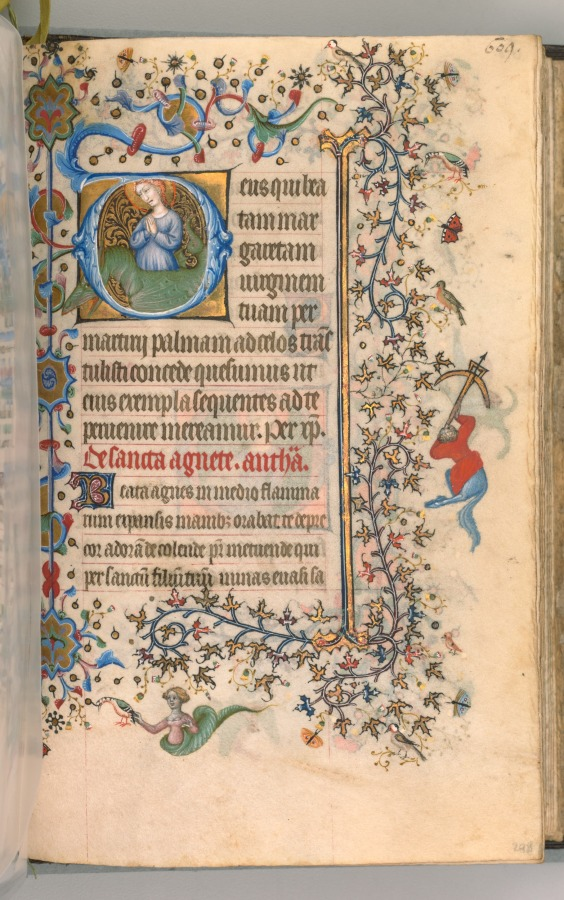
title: Hours of Charles the Noble, King of Navarre (1361-1425): fol. 299a, St. Margaret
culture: France, Paris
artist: Master of the Brussels Initials and Associates (French)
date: c. 1405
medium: ink, tempera, and gold on vellum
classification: Bound Volume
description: This precious volume was obviously highly prized by its owner, the French-born King of Navarre, who had his coat of arms painted on no less than twenty folios. Rather than directly commissioning this manuscript from a specific workshop, it seems that Charles the Noble acquired his book of hours -- perhaps ready-made for the luxury market -- while on a trip to Paris in 1404-05. A collaborative effort, six painting styles are evidenced within the pages of this codex, those of two Italians, two Frenchmen, and two Netherlanders. The painter who was responsible for the planning and decoration of the book, and who produced seventeen of the large miniatures, was a Bolognese artist known as the Master of the Brussels Initials. His principal assistant, responsible for most of the borders, was a Florentine who signed his name "Zecho" da Firenze on folio 208 verso.